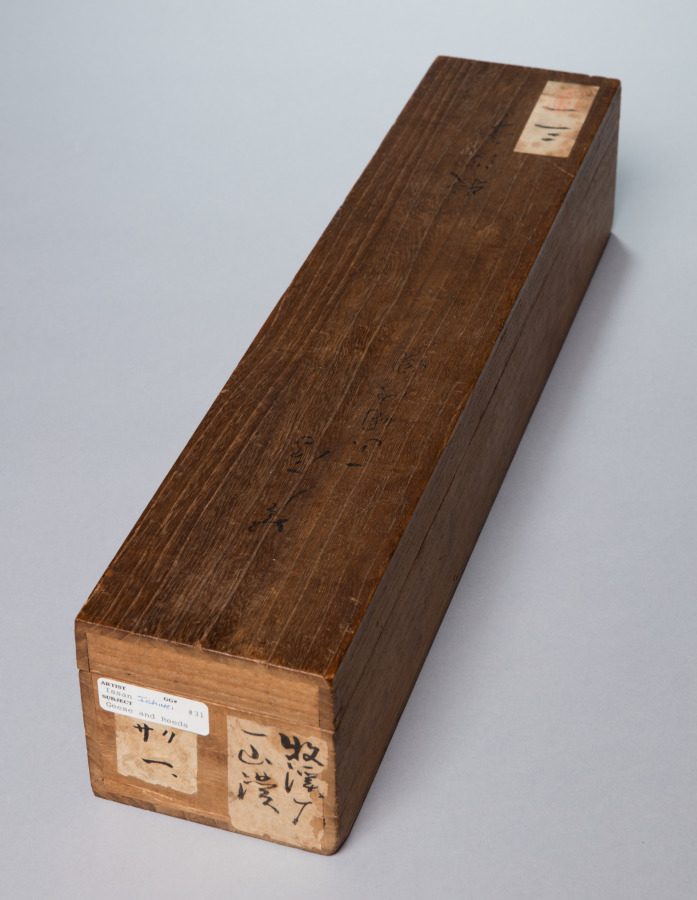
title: Reeds and Geese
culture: Japan, Kamakura period (1185–1333)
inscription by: Yishan Yining [Issan Ichinei] (Chinese, 1247–1317)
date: 1314–17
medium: hanging scroll; ink on paper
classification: Painting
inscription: signed: Issan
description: Reeds and geese has been a common pairing in Chinese literary and visual culture for many centuries. This painting presents the contribution of a Japanese amateur painter, almost certainly a Zen Buddhist monk, to Japan’s fledgling efforts to add the theme to its own cultural vocabulary in the early 1300s. As was customary at the time in Japan, the painter did not sign or seal his work; the inscription, a poem added to the painting by the eminent émigré monk Yishan Yining, along with his signature and seal, was of far greater cultural value. Today, the modestly sized painting has tremendous significance as one of the earliest surviving examples of Japanese ink paintings with reeds and geese.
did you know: Tokyo National Museum owns a copy of this painting made by Kano Gyokusen (1796–1864) when he was 14 years old.